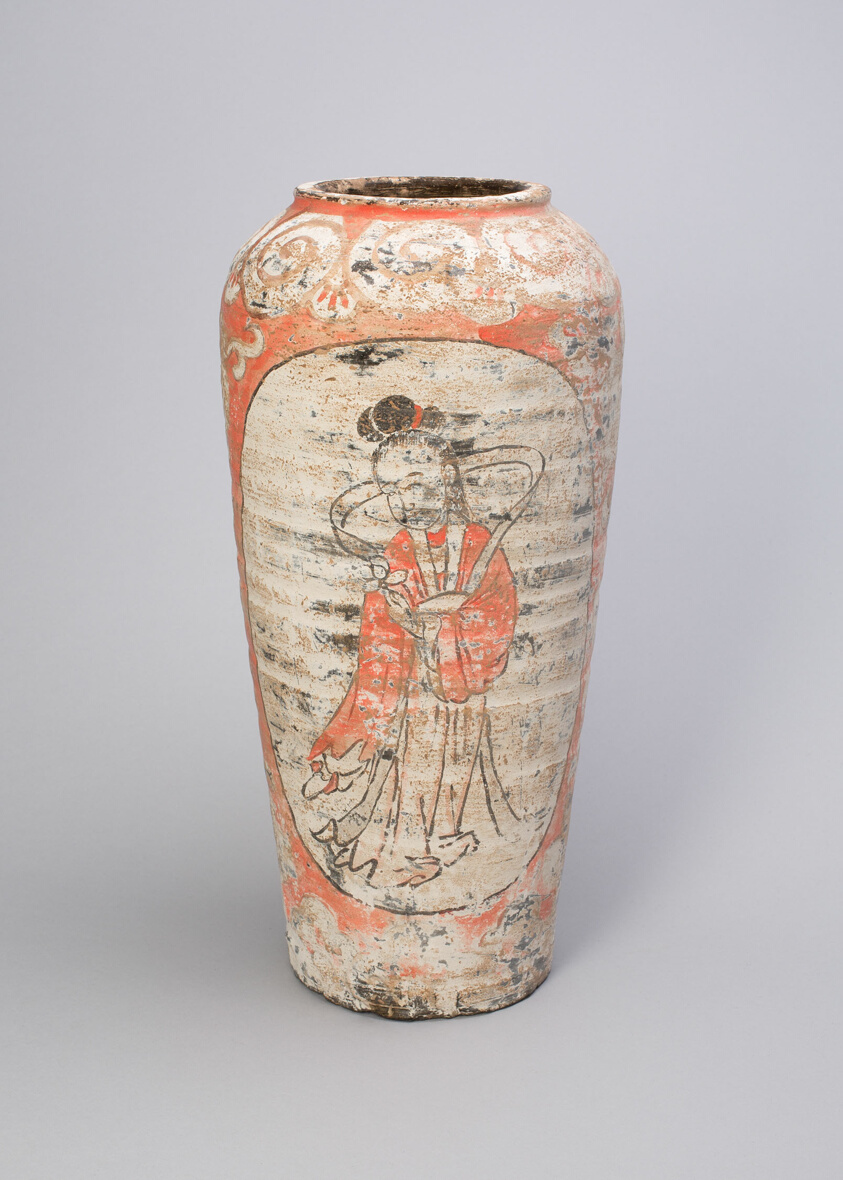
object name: Vessel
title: Jar with Two Figures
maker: China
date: Tang dynasty (618–906)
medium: Stoneware with slip and painted decoration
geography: China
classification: ceramics; asian art; vessel